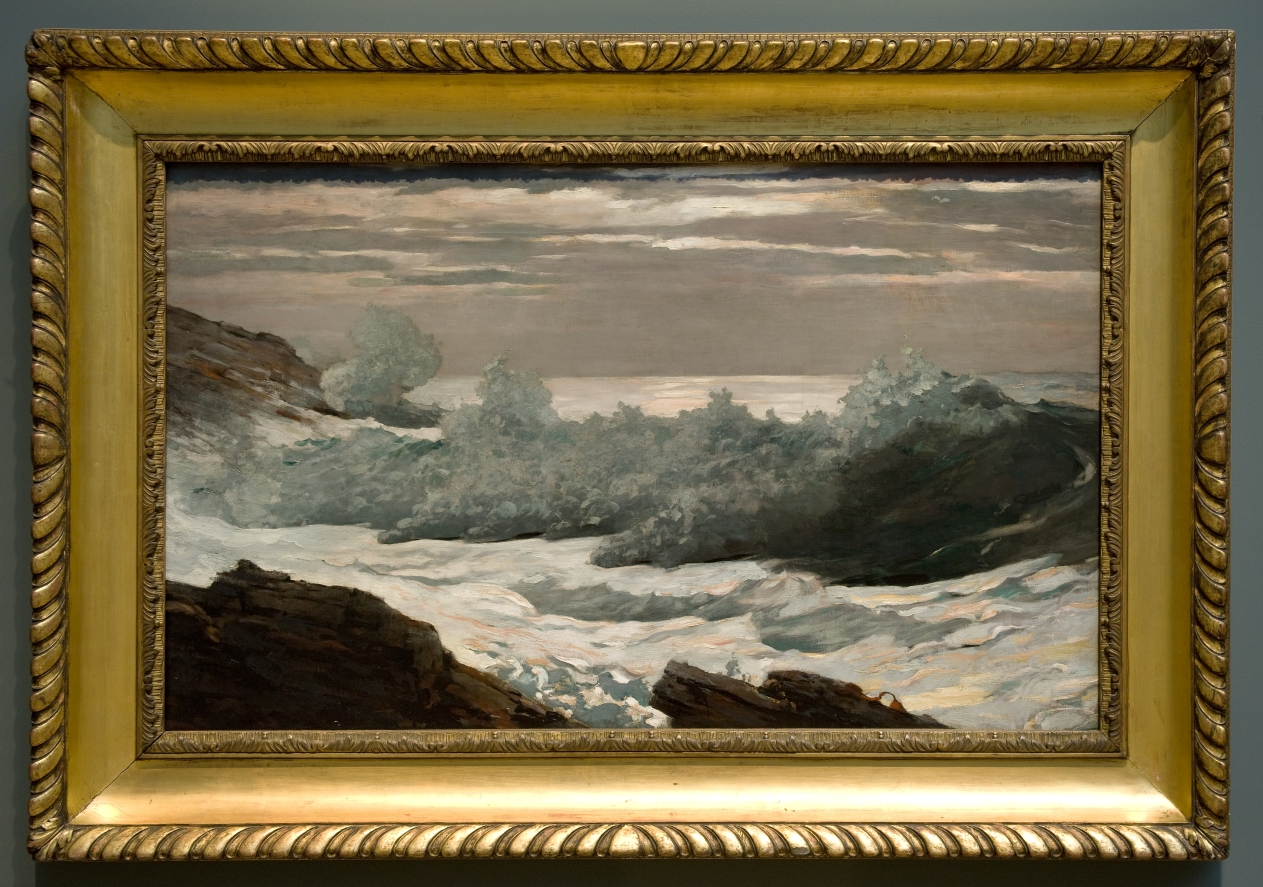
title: Early Morning After a Storm at Sea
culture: America, late 19th-early 20th Century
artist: Winslow Homer (American, 1836–1910)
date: 1900–1903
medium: oil on canvas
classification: Painting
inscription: Signed lower left: "HOMER / 1902"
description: The powerful Atlantic surf pounding against the desolate coast of Prouts Neck, Maine, provided primary subject matter for the dramatic paintings that Homer created during his final decades. This example, which the artist proclaimed as "the best picture of the sea that I have painted," was initially conceived as a watercolor. Undertaking the composition in oil after a lapse of nearly two decades, Homer patiently waited for the appropriate atmospheric conditions, executing the work in four different sessions spread over two years.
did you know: Winslow Homer's studio in Prouts Neck, Maine, is a National Historic Landmark.